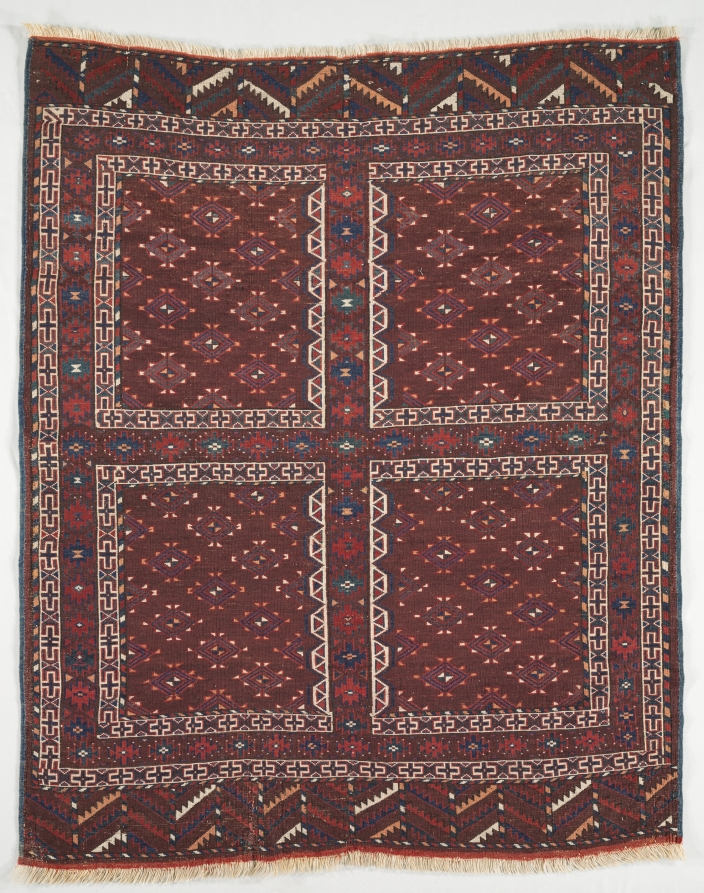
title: Door Rug (Ensi)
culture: Turkmenistan, Yomud, 19th century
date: c. 1900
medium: knotted pile, asymmetrical knot, 117 knots psi; wool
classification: Carpet